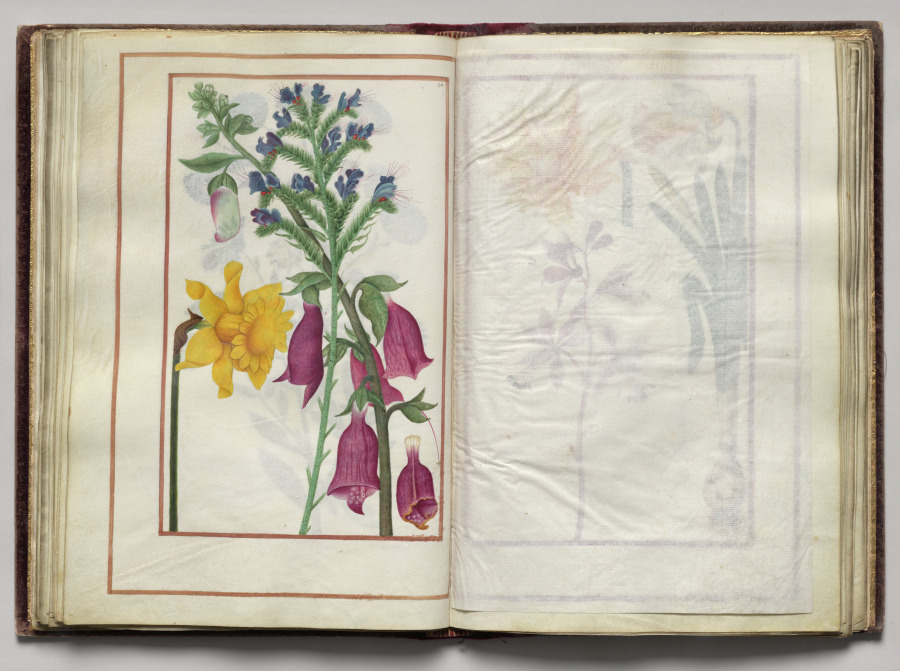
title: Florilegium (A Book of Flower Studies)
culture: France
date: 1608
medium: bound manuscript of 48 leaves, 77 drawings; watercolor, ink, silver, and gold over occasional traces of pencil, on vellum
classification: Bound Volume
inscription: Dated: Poitiers 1608 (on frontispiece) Signed: On frontispiece in black ink, lower right: Van Kuyk Notation on drawing: Frontispiece: in pencil, lower margin: * élève de Van Kessel, peintre flammand (* in pencil also appears in front of Van Kuyk's name).